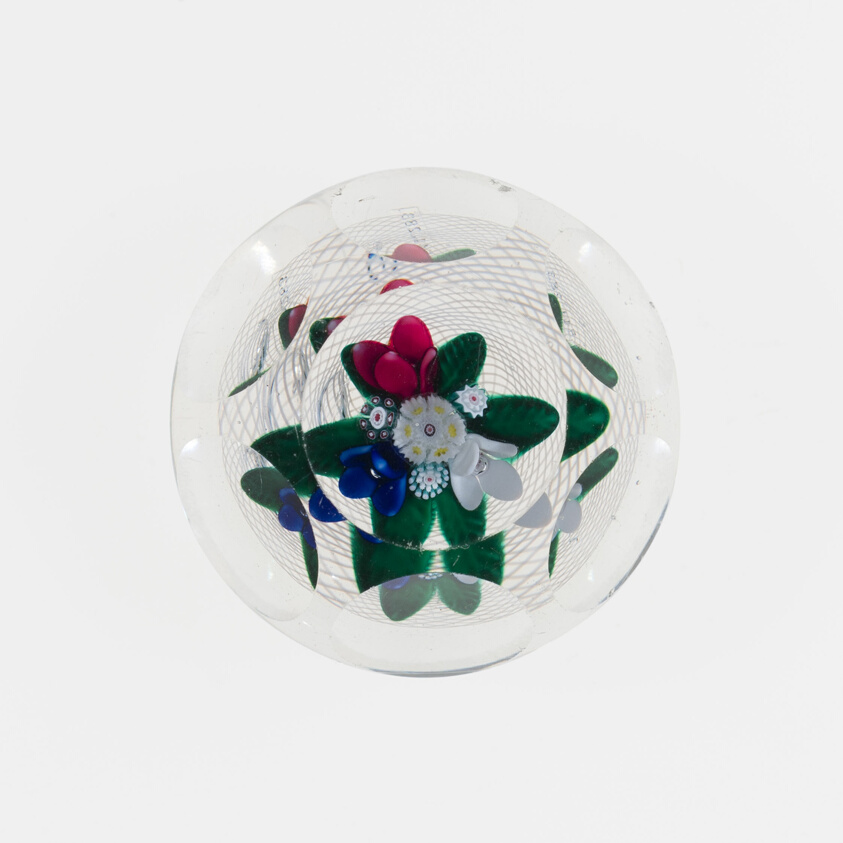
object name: Glass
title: Paperweight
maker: Boston and Sandwich Glass Company (Sandwich, Massachusetts, 1826-1888)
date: Late 19th century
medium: Glass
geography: United States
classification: paperweight; glass